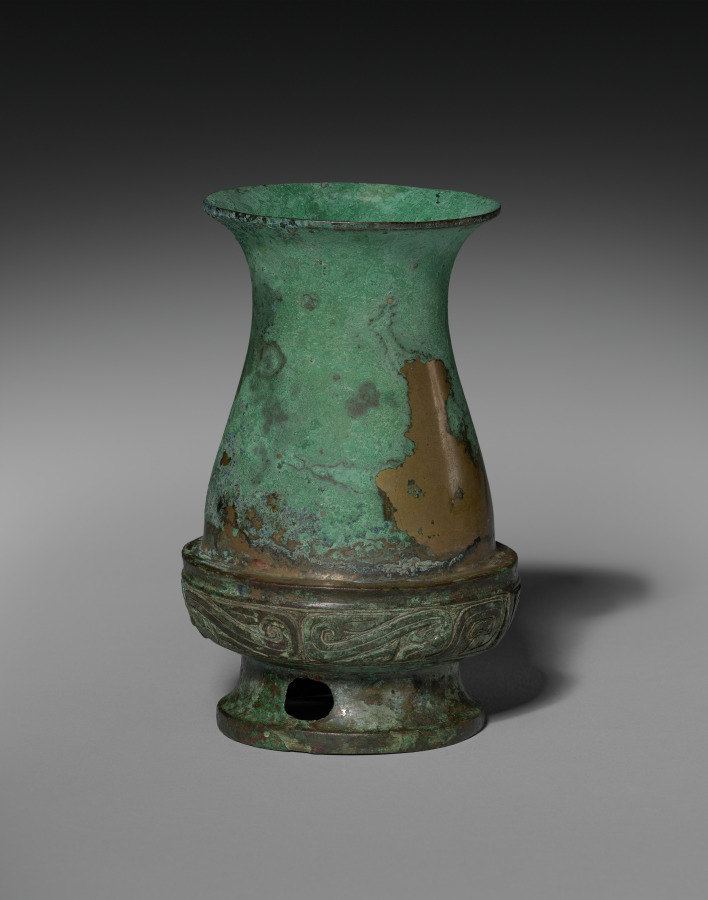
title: Wine Vessel (Hu) (lid)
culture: China, Western Zhou dynasty (c. 1046–771 BCE)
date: c. 1000–900 BCE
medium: bronze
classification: Metalwork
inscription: inscription inside top (cup): 事从作壺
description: This tall, slender bronze wine vessel, called a hu, has three bands of ornamentation: one above the foot, one around the neck, and one on the cover. Stylized birds or phoenixes are in the band around the neck, while the band on the cover and foot feature geometric dragons. The dragon and the phoenix may represent the Yin and Yang and would be equally appropriate on a bronze of either secular or religious purposes. It likely held liquids like wine at festive banquets or religious ceremonies.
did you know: When inverted, the cover forms a cup.